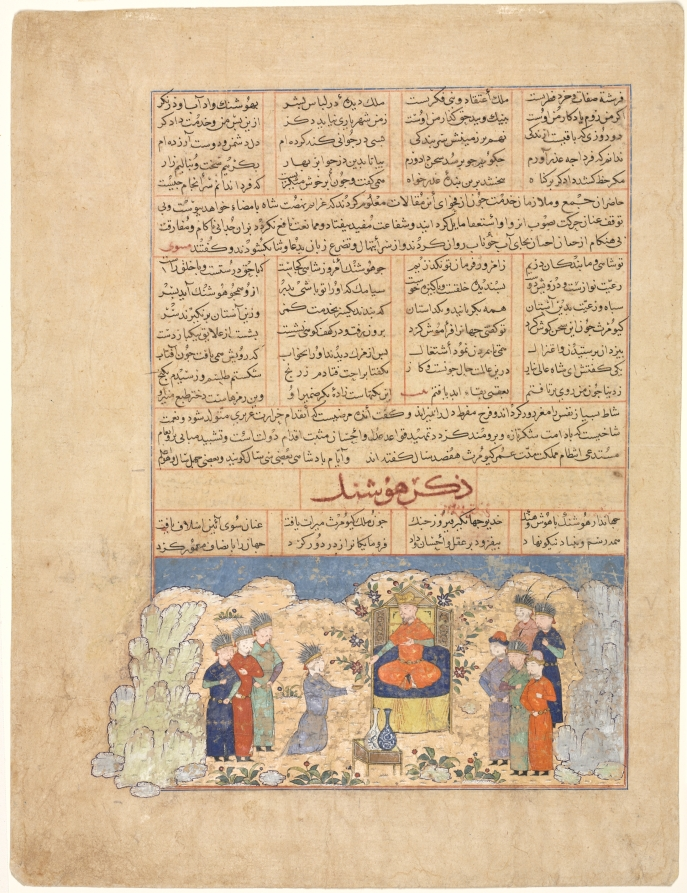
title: The Story of Hushang, from a Majma al-tavarikh (A Compendium of Histories) of Hafiz-i Abru (recto)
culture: Afghanistan, Herat, Timurid period (1370–1501)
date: 1425–50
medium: opaque watercolor and ink on paper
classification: Manuscript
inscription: script: Naskh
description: These two pages are from a manuscript that evidently was written and illustrated for the library (at Herat) of the Timurid king Shah Rukh, the son of Timur (Tamerlane). The Majma' al-Tawarikh traced the history of the world, beginning with the prophets of the Old Testament until the reign of Shah Rukh.